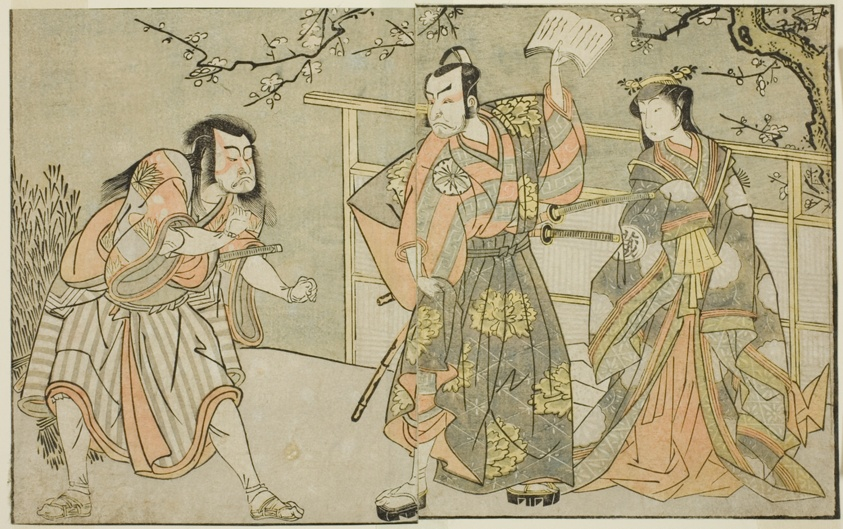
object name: Print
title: The Actors Yamashita Yaozo I as Ono no Komachi (right), Matsumoto Koshiro II as Godai Saburo (center), and Ichikawa Danzo III as Otomo no Kuronushi (left), in the play "Kuni no Hana Ono no Itsumoji," performed at the Nakamura Theater in the eleventh month, 1771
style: Japanese (culture or style)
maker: Katsukawa Shunsho 勝川 春章; Japanese, 1726-1792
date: c. 1772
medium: Color woodblock print; page from the illustrated book "Yakusha Kuni no Hana"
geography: Japan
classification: woodblock print; print; asian art